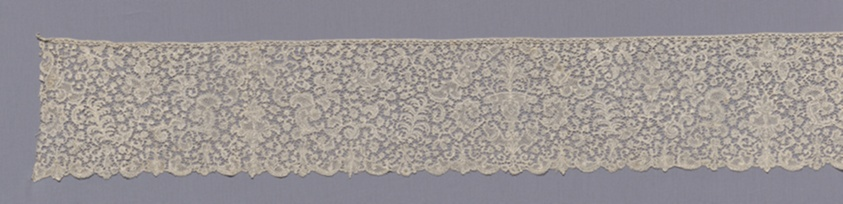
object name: Textile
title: Lace Flounce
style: 18th Century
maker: Flanders, Brussels (present day Belgium)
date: 1701-25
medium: Linen, bobbin part lace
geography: Flanders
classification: textile; lace - bobbin; lace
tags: fountains, cartouches, arabesque, vines